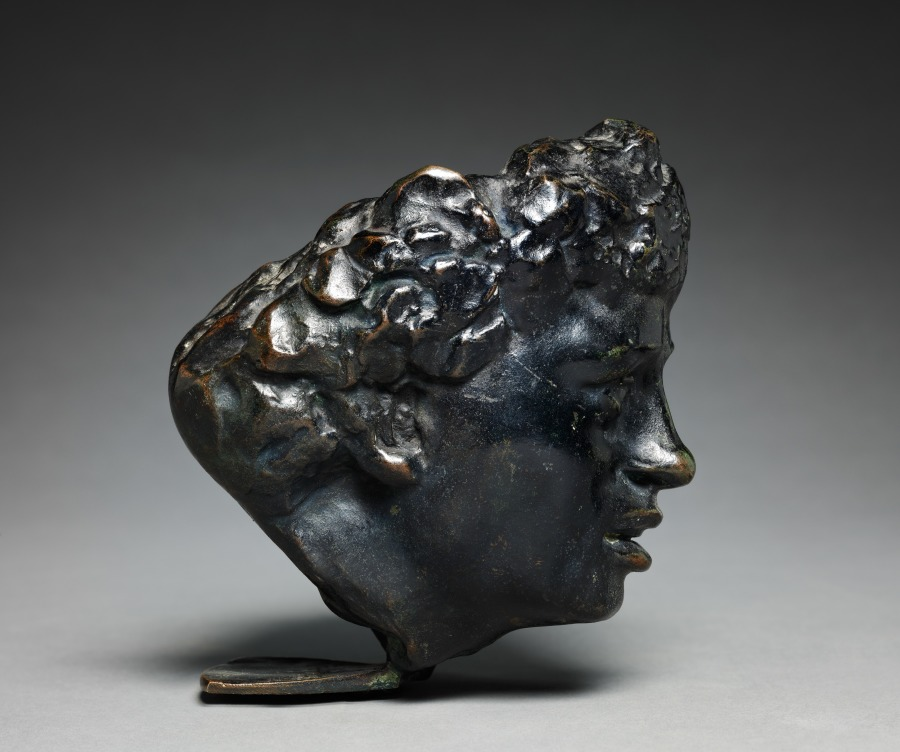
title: Mask of Séverine (Caroline Rémy)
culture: France, 19th century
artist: Auguste Rodin (French, 1840–1917)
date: 1893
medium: bronze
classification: Sculpture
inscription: Signed sinister side of neck: "A. Rodin"; inside dexter side in relief: "A. Rodin"